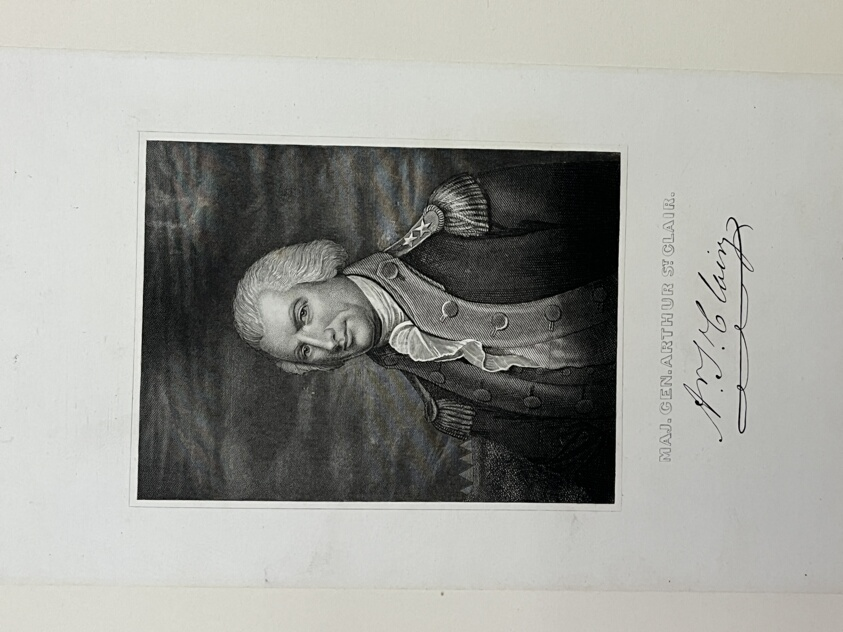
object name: Print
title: Major General Arthur St. Clair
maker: Artist Unknown (Likely American, 19th century); after Edward Wellmore (American, active mid-19th century); after James Barton Longacre (American, 1794-1869); after Charles Wilson Peale (American, 1741-1827)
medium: Etching on paper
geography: United States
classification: reproduction; print; prints and drawing